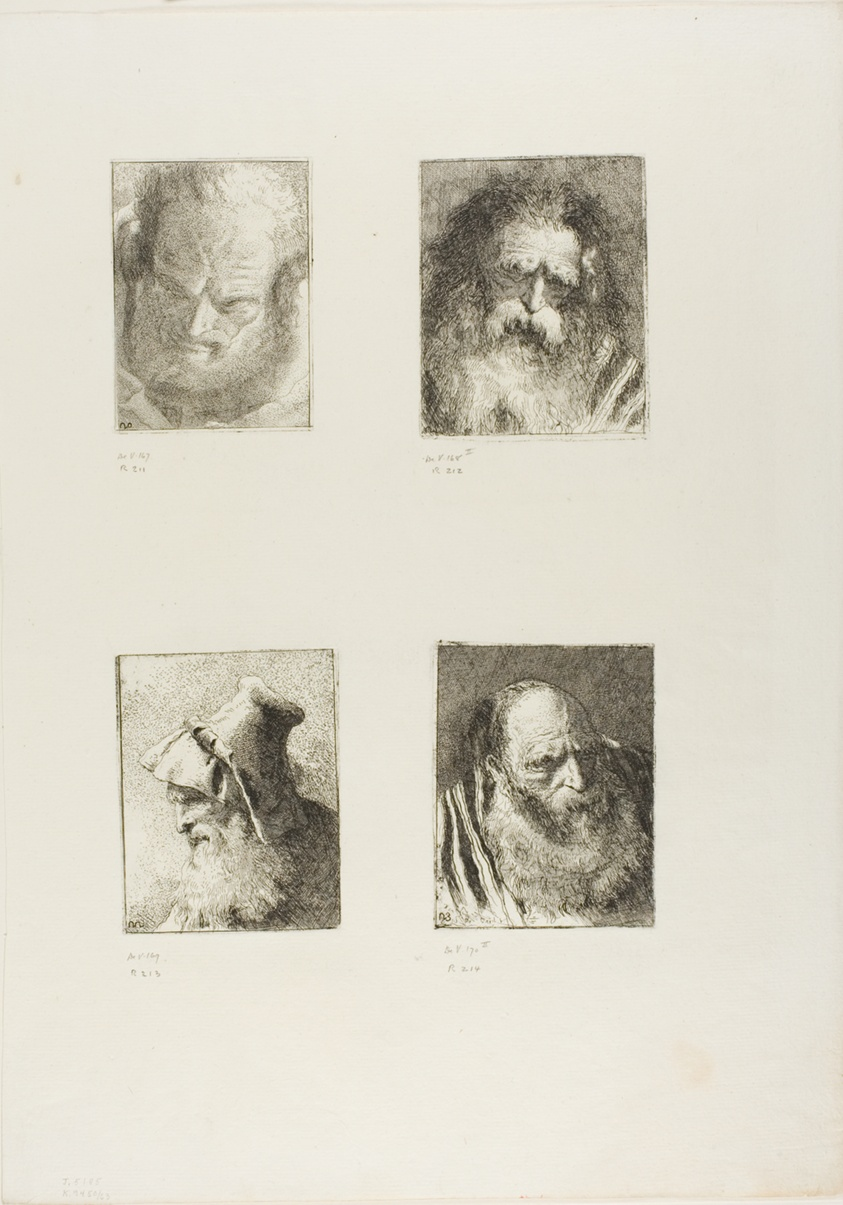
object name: Print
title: Old Man Looking Downwards, Old Man Seen from the Front, Profile of an Old Man with a Beard, Old Man in a Striped Robe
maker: Giovanni Domenico Tiepolo (Italian, 1727-1804)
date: 1775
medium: Four etchings on ivory laid paper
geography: Italy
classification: etching; print; prints and drawing